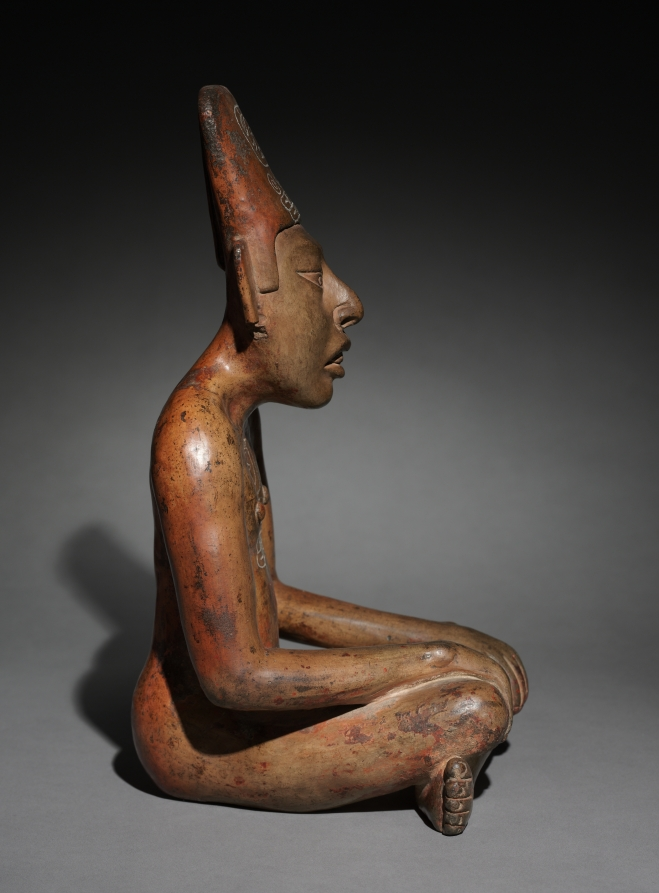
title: Seated Figure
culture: Mexico, Oaxaca, Zapotec style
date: 300 BCE–700 CE (thermoluminescence date, 285 BCE–515 CE)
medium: ceramic, slip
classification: Sculpture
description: The most famous Zapotec tomb ceramics are elaborate figural urns flanked by smaller, simpler companions similar to this one. Like other companions, this example probably belonged to a set of nearly identical figures; two others remain in Mexico. The identity of ceramic tomb figures-whether elite humans, royal ancestors, or deities-is still debated. The Zapotec developed one of Mesoamerica’s earliest writing systems, evidenced by the hieroglyphs on the headdress and chest. These are the names of calendar days, "13 Water" and "13 Flint Knife," respectively. Because people were named after the day on which they were born, one hieroglyph may identify the figure.